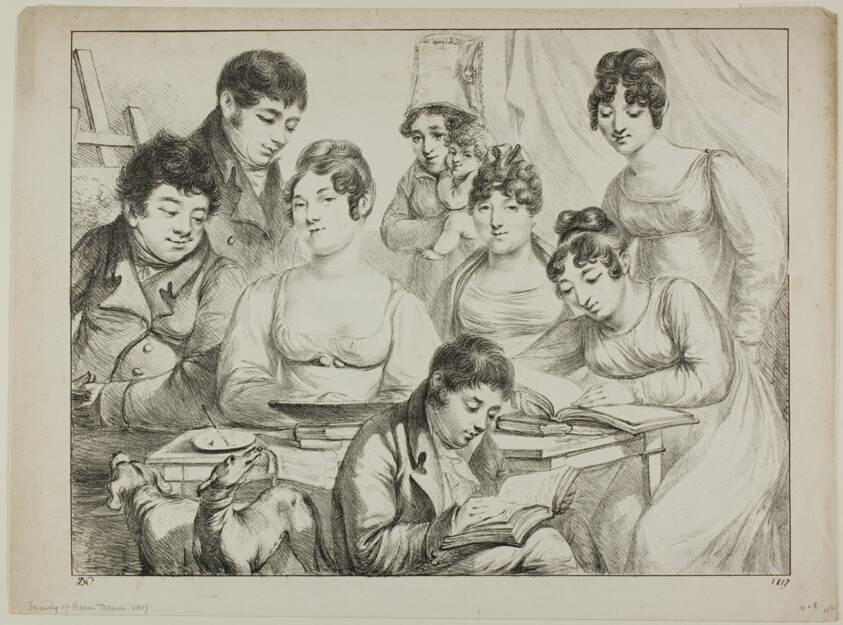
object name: Print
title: Conversation, a Family Drawing and Reading, the Nurse Holding an Infant, a Portrait of Prince Edmond de Beauvau Behind a Chair, and Portraits of Madame Lavallée and Madame Vallory, Both Seated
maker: Dominique-Vivant Denon (French, 1747-1825)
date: 1817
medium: Lithograph in black on ivory wove paper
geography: France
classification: lithograph; print; prints and drawing